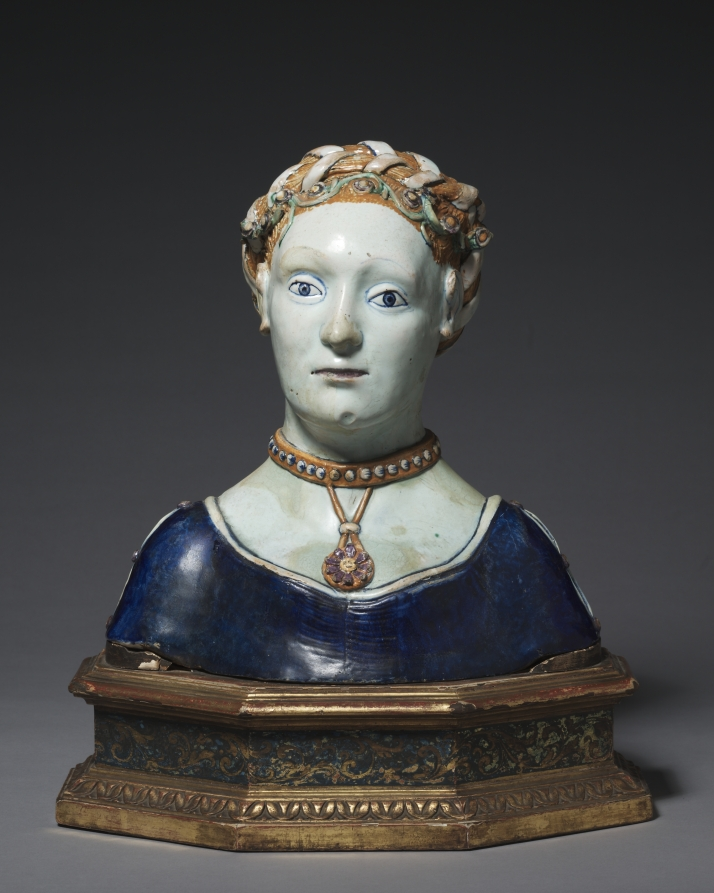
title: Bust of a Woman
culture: Italy, Tuscany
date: early 1500s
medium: tin-glazed earthenware (maiolica)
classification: Sculpture